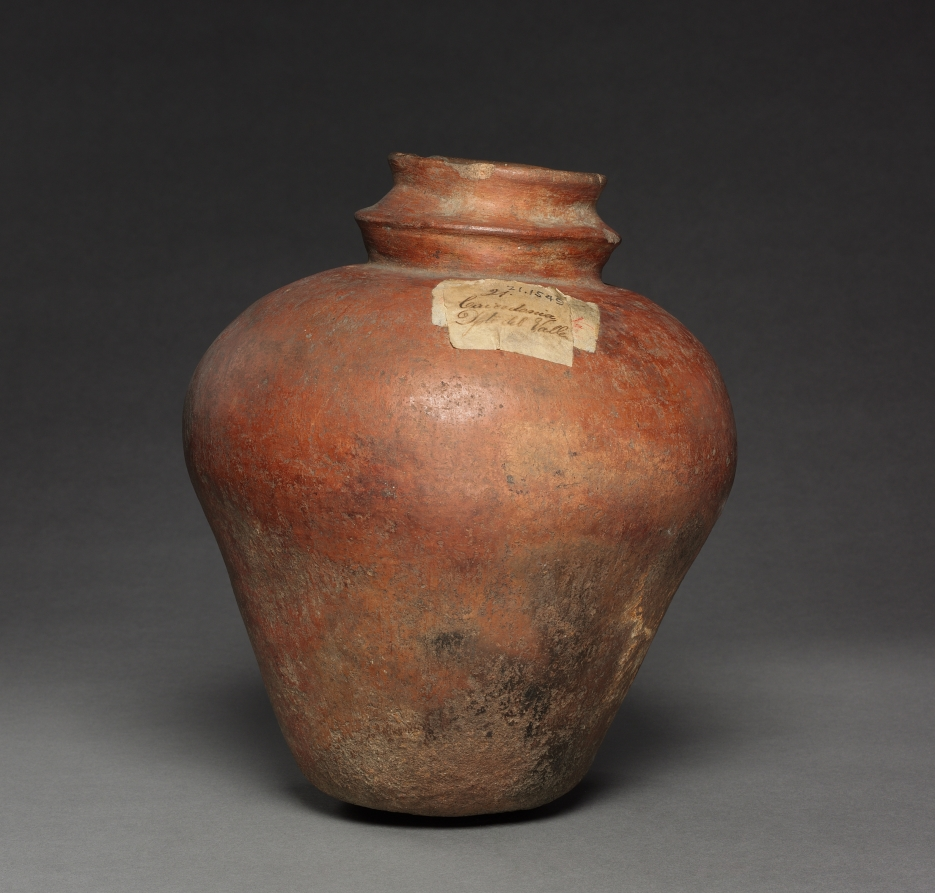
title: Vase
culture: Colombia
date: before 1921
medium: pottery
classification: Ceramic